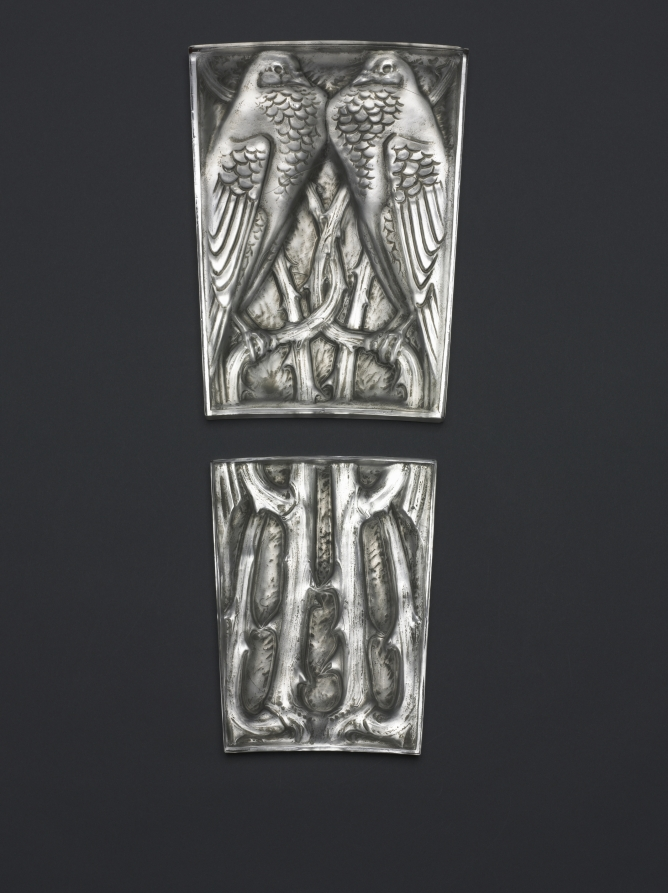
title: Two Pigeons Panels (Panneaux deux pigeons)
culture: France, 20th century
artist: René Lalique (French, 1860–1945)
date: 1914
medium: molded glass with mirrored backplate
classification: Glass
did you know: The title of this work translates to curved panels with two pigeons.